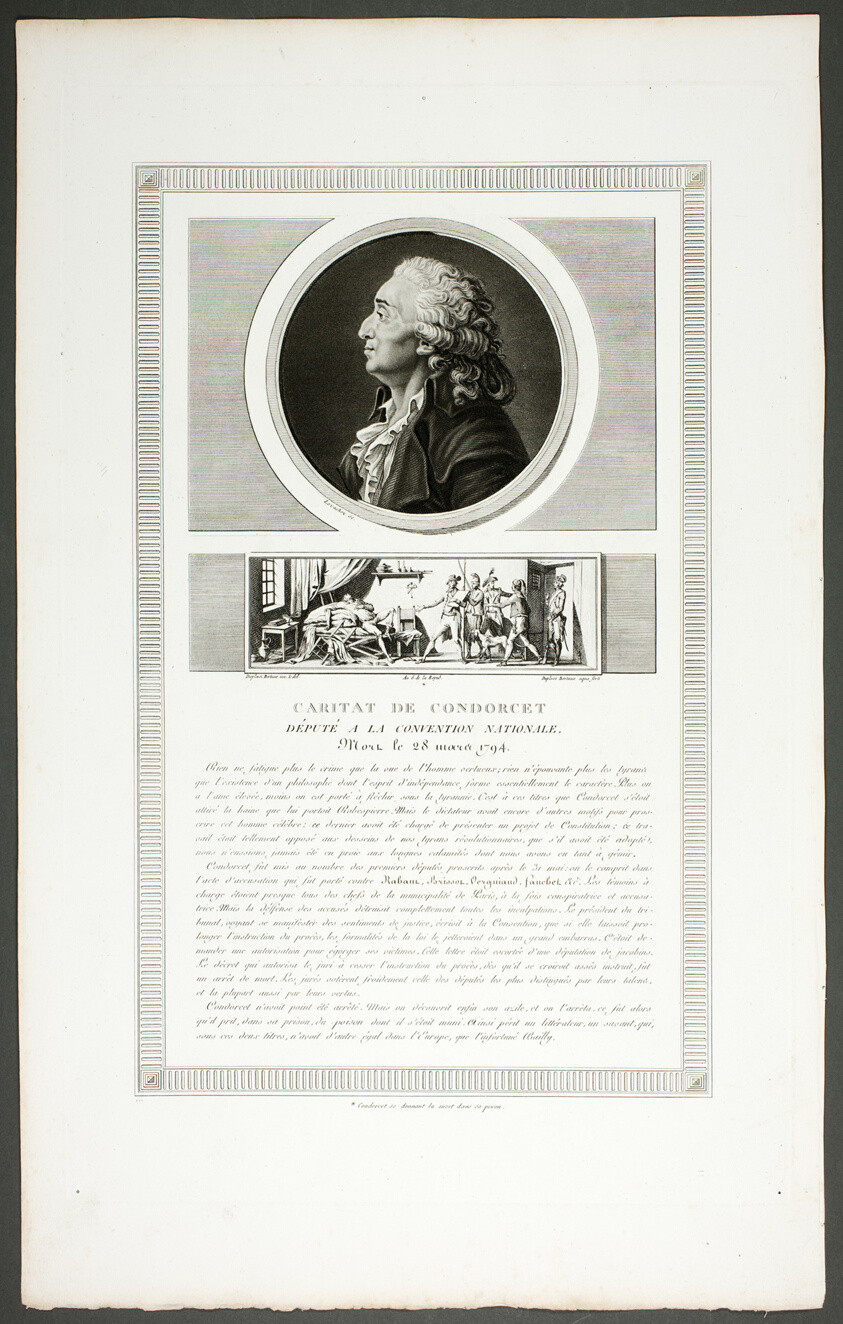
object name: Print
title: Caritat de Condorcet, Deputy at the National Convention, from the series Tableaux historiques de la révolution française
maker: Charles François Gabriel Levachez, and Son (French, 18th and 19th century); Jean Duplessi-Bertaux (French, 1747-1819)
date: 1798–1804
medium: Aquatint and etching, with engraving, on ivory wove paper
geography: France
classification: etching; print; prints and drawing